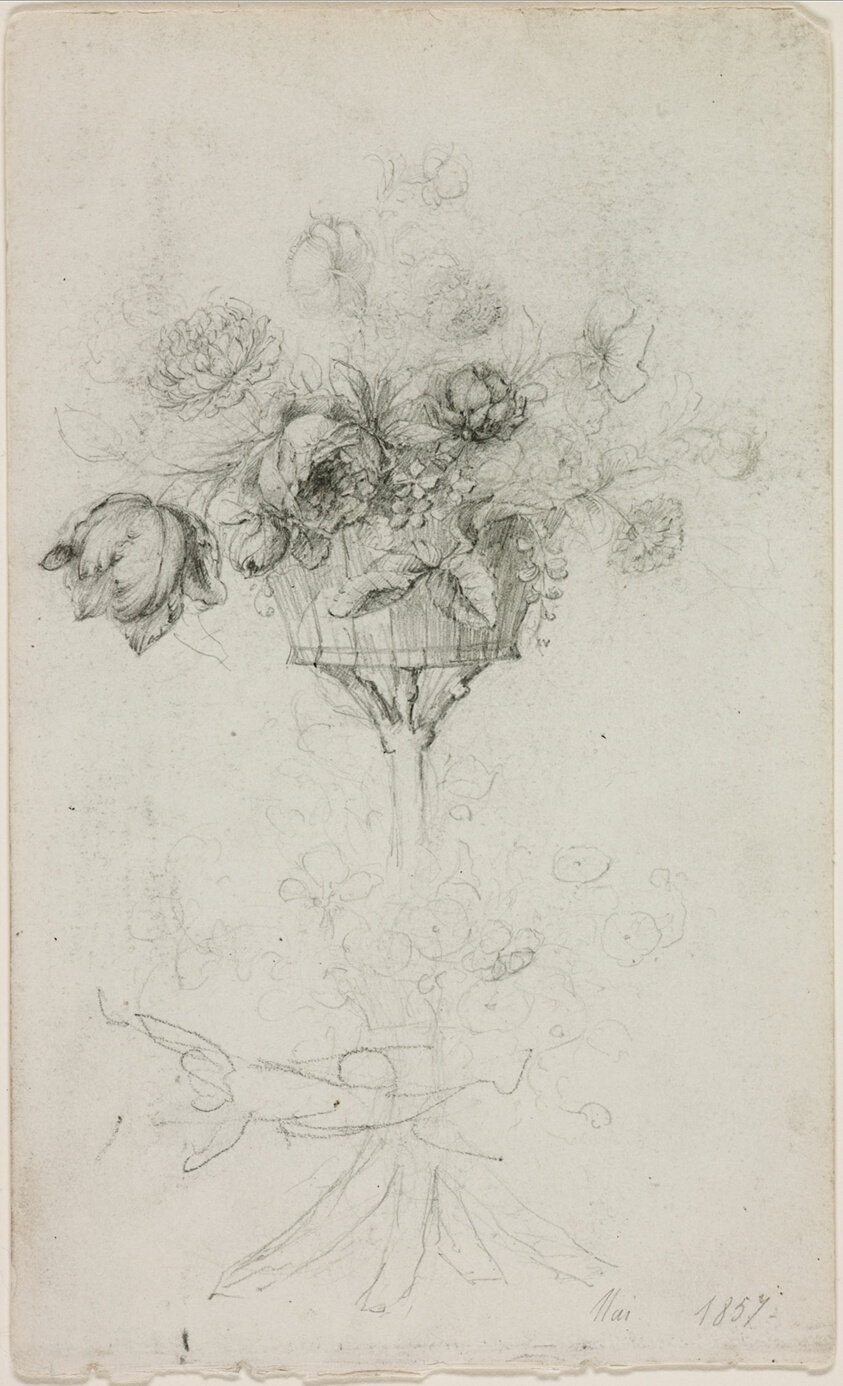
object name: Drawing and Watercolor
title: Vase of Flowers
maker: Pierre Auguste Renoir; French, 1841–1919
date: May 1857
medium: Graphite on white wove paper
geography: France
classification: prints and drawing; graphite; drawings (visual works)